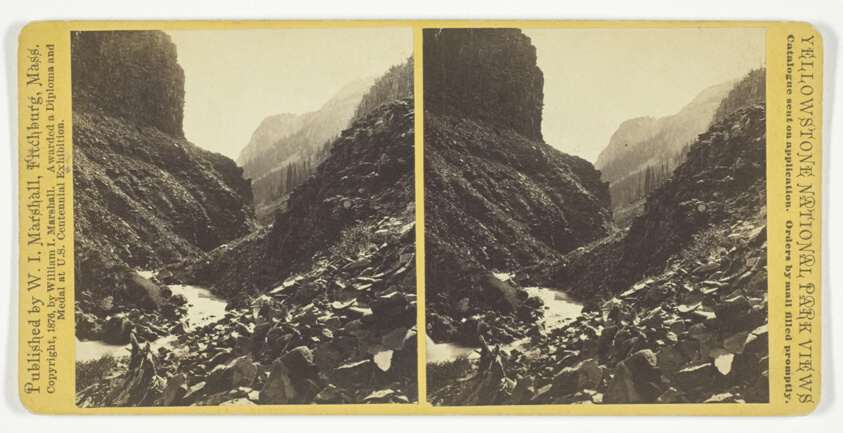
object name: Photograph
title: Giant's Gateway, Cañon of North Fork, No. 83 from the series "Yellowstone National Park Views"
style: 19th century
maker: William I. Marshall (American, active late 19th century)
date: 1876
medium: Albumen print, stereo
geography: United States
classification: stereograph (albumen); albumen silver print; photographic process; photography; photograph